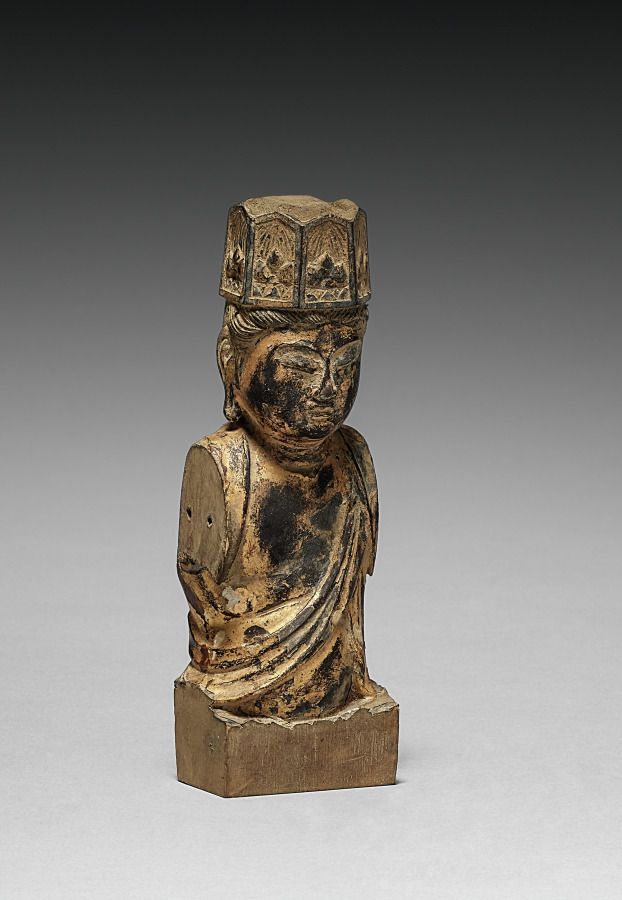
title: Bodhisattva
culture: Japan, Heian period (794–1185)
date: 900s-1100s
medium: gilded wood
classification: Sculpture